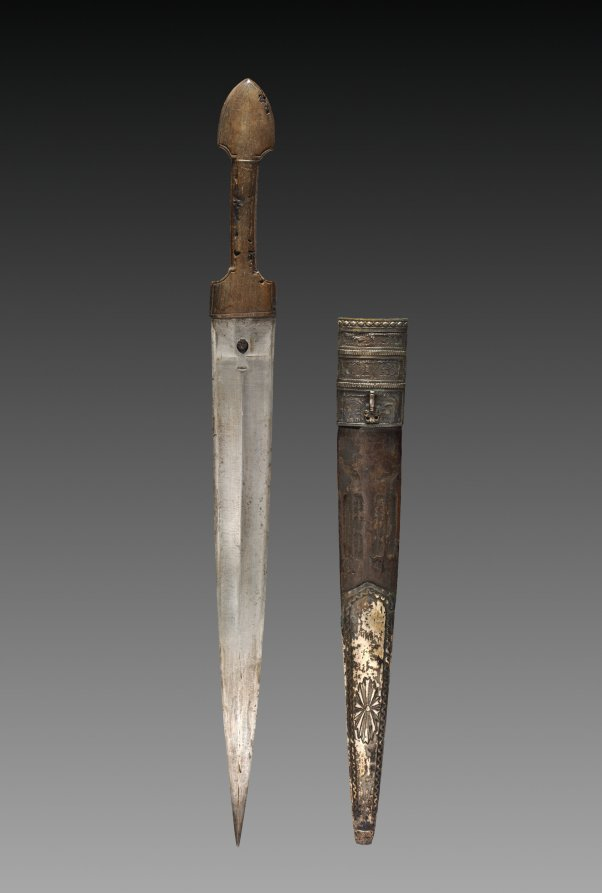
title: Dagger (Khanjali) with Scabbard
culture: Transcaucasian, Georgian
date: 1700s–1800s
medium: carnelian?, steel, wood handle, copper alloy, and silver gilt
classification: Arms and Armor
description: A khanjali is a dagger popular with the inhabitants of Georgia and the rest of the Caucasus since ancient times. They often have a single offset groove on each face of the blade and the shape is similar to the ancient Roman gladius and the Scottish dirk.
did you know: Scabbards for daggers like these are usually highly engraved with gold or silver designs and can sometimes include embedded gemstones.